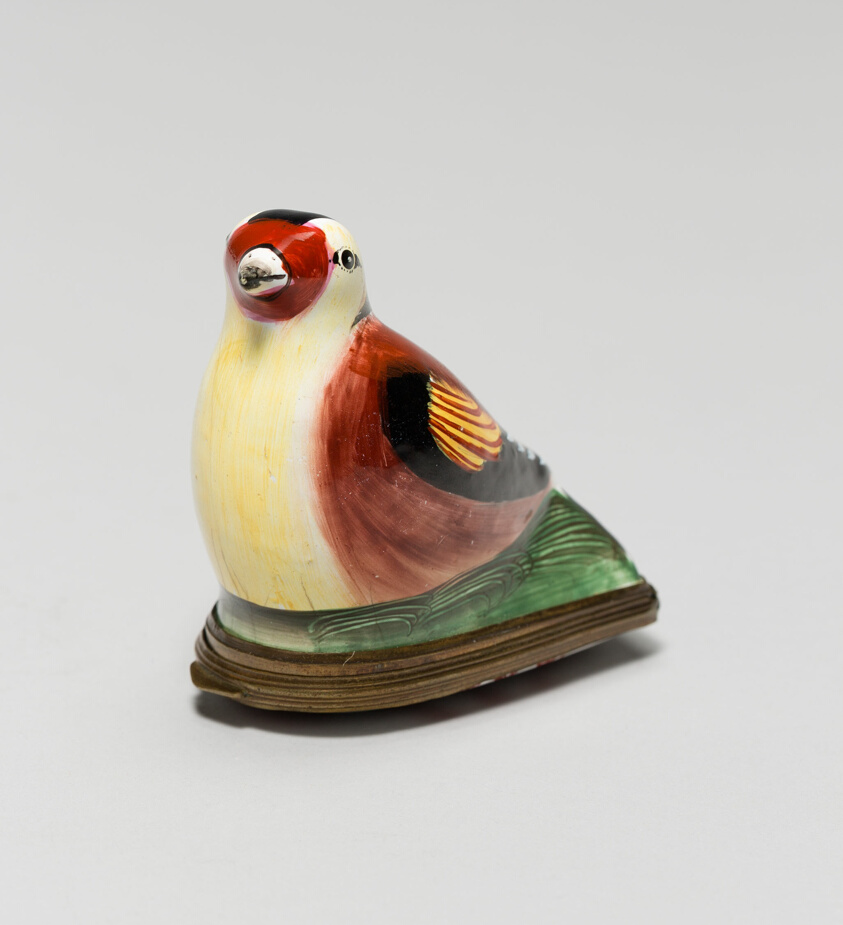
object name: Metalwork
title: Bonbonnière in the Shape of a Gold Finch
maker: South Staffordshire, England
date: 1760/80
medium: Polychrome enamel on copper with metal mounts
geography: England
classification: enamel; metalwork